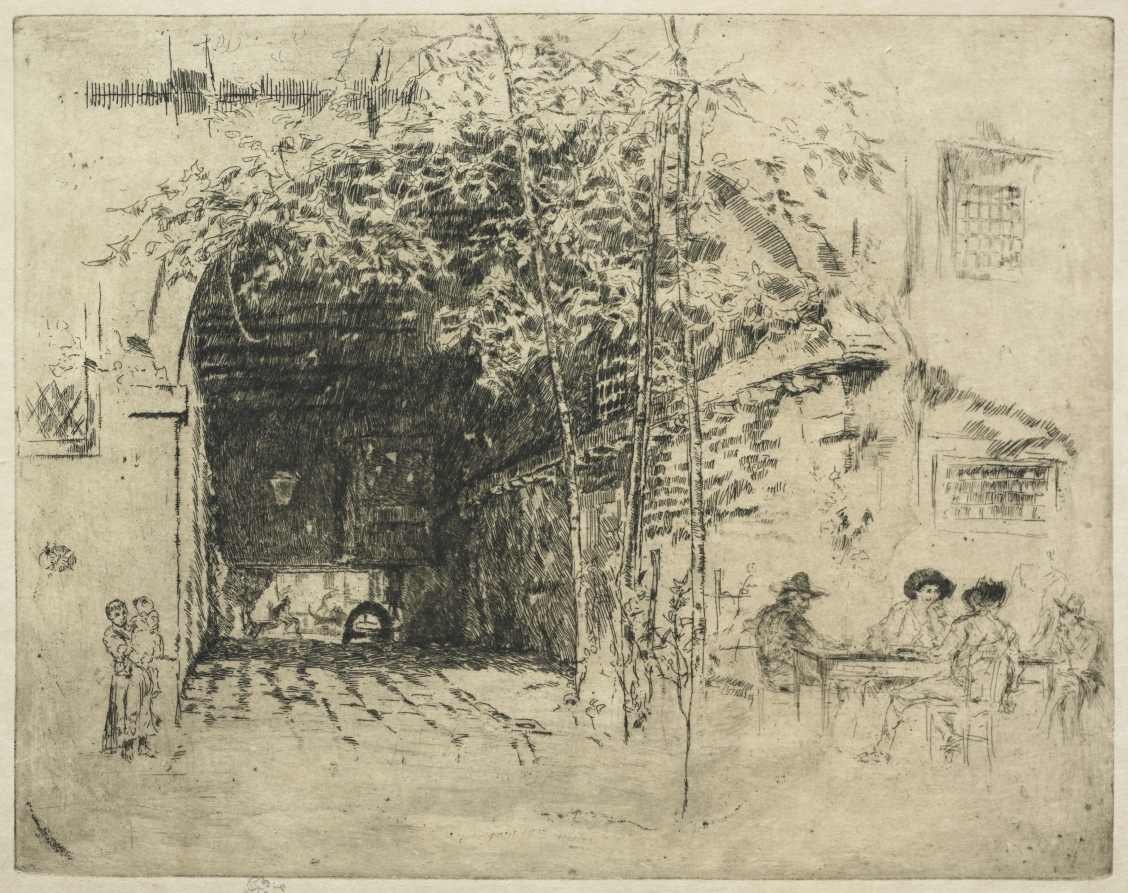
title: Traghetto, No. 2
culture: America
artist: James McNeill Whistler (American, 1834–1903)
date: 1880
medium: etching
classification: Print